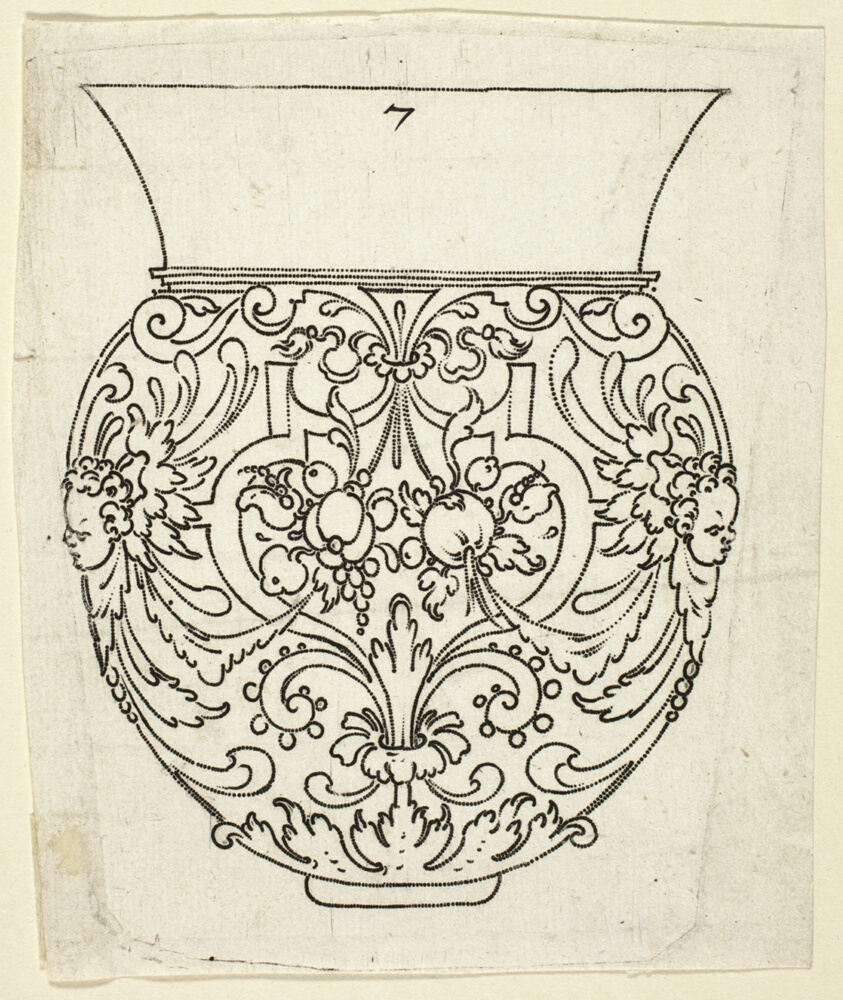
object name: Print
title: Plate 7, from XX Stuck zum (ornamental designs for goblets and beakers)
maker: Master A.P. (German, active early 17th century)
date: 1601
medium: Punch engraving in black on ivory laid paper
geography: Germany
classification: engraving; print; prints and drawing